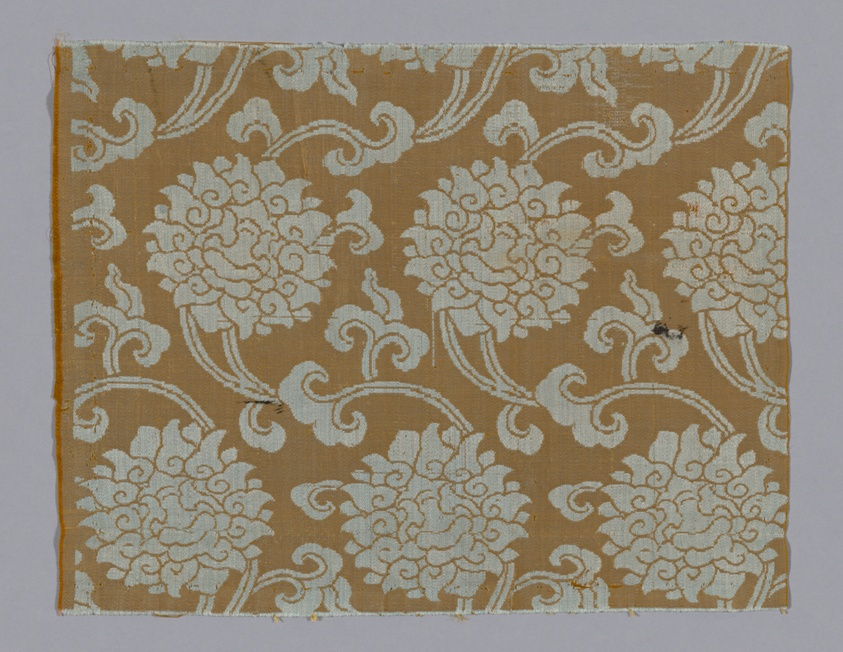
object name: Textile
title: Fragment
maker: China or Japan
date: 18th century, late Edo period (1789–1868)/ Meiji period (1868–1912)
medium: Damask, silk.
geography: China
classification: textile; weaving